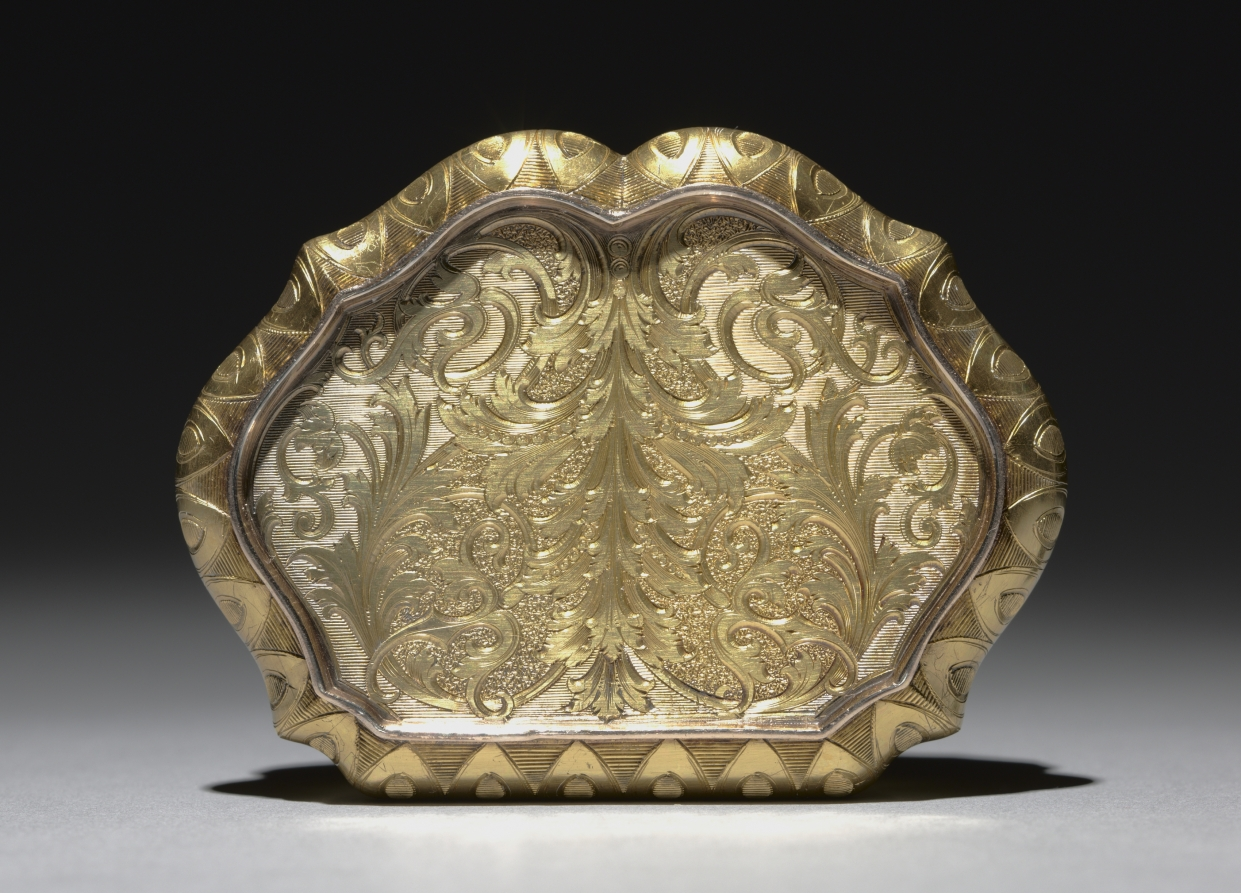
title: Box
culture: Switzerland, Neufchatel, 19th century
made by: Goffert (Russian)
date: c. 1850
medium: gold set with diamonds around a miniature of Tsar Alexander III (1845-1894)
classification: Miscellaneous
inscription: miniature signed in Russian: " " (Goffert).